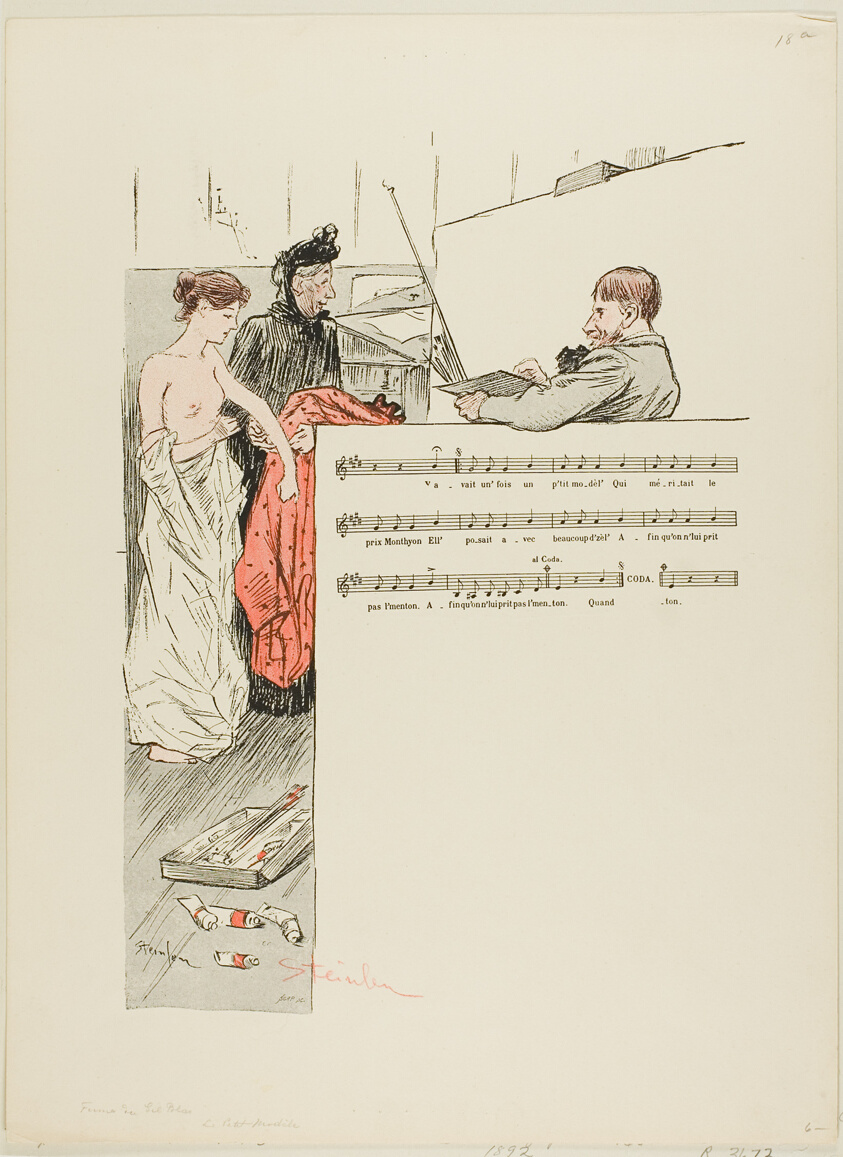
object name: Print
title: The Little Model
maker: Théophile-Alexandre Steinlen; French, born Switzerland, 1859-1923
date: published 1892–1900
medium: Photorelief print in red and black with letterpress music/lyrics on ivory wove paper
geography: France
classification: photorelief; print; prints and drawing